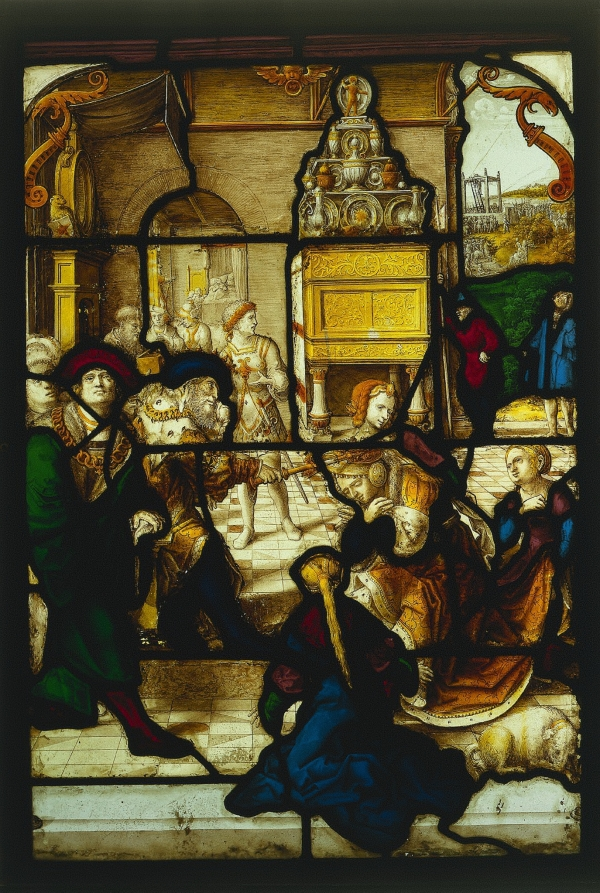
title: Esther before Ahasuerus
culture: Netherlands, South Lowlands, 16th century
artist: Dirk Vellert (Netherlandish, 1480/85–1547)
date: c. 1530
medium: pot metal, white glass, and silver stain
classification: Glass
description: Though also a painter and printmaker, Dierick (or Dirk) Vellert is best known as a designer of stained glass. Active in Antwerp, where he became a master of the Guild of Saint Luke in 1511, Vellert richly ornamented his work with garlands, masks, vases, and other classically inspired motifs. A great deal of his glass was exported. As an engraver, his prints owe a good deal to Albrecht Dürer and Luca van Leyden. These two panels depict famous incidents from the Old Testament featuring the rendering of judgment. Both may have originally been made for a council chamber or a court of justice. Conceivably, because of their subjects, they could have served as models of justice for the magistrates who deliberated within view of them.